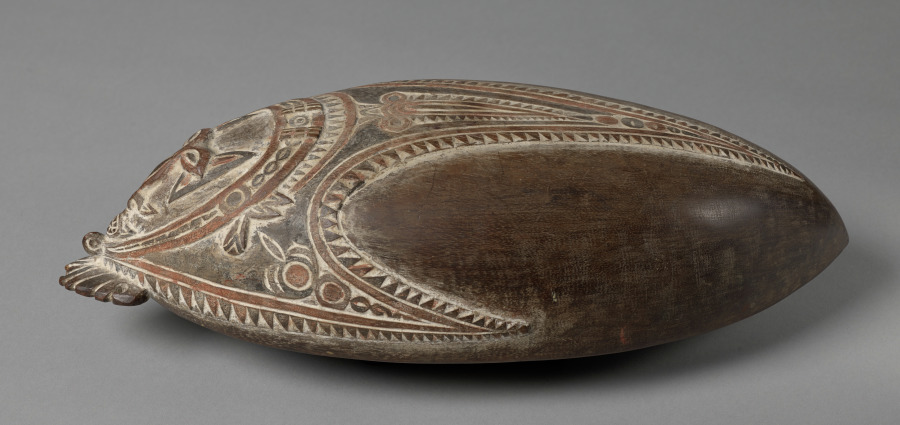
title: Bowl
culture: Melanesia, Papua New Guinea, Huon Gulf, Tami Islands, 19th century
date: 1800s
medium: painted wood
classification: Sculpture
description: The people of the Tami Islands manufactured canoes, house beams, drums, bowls, lime spatulas, and neckrests using tools such as stone axes, bamboo knives, tree-bear teeth, and pig, cassowary, and dog bones. Tami bowls were carved from the hard wood of the azalea and decorated with patterns that vary from deep etching to high relief. Many bowls were blackened with a graphite compound and highly polished. Decorative patterns were owned by specific families, and could not be used by other carvers.